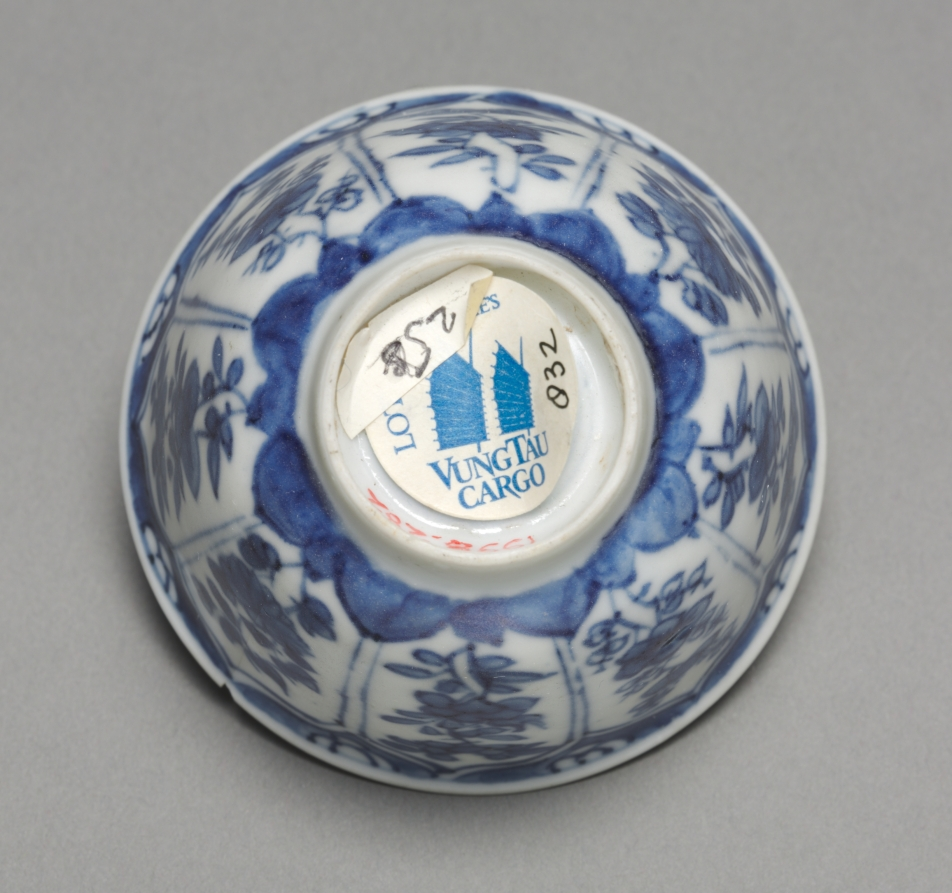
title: Tea Cup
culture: China, Qing dynasty (1644-1911)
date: c. 1690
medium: porcelain with blue and white decoration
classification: Ceramic